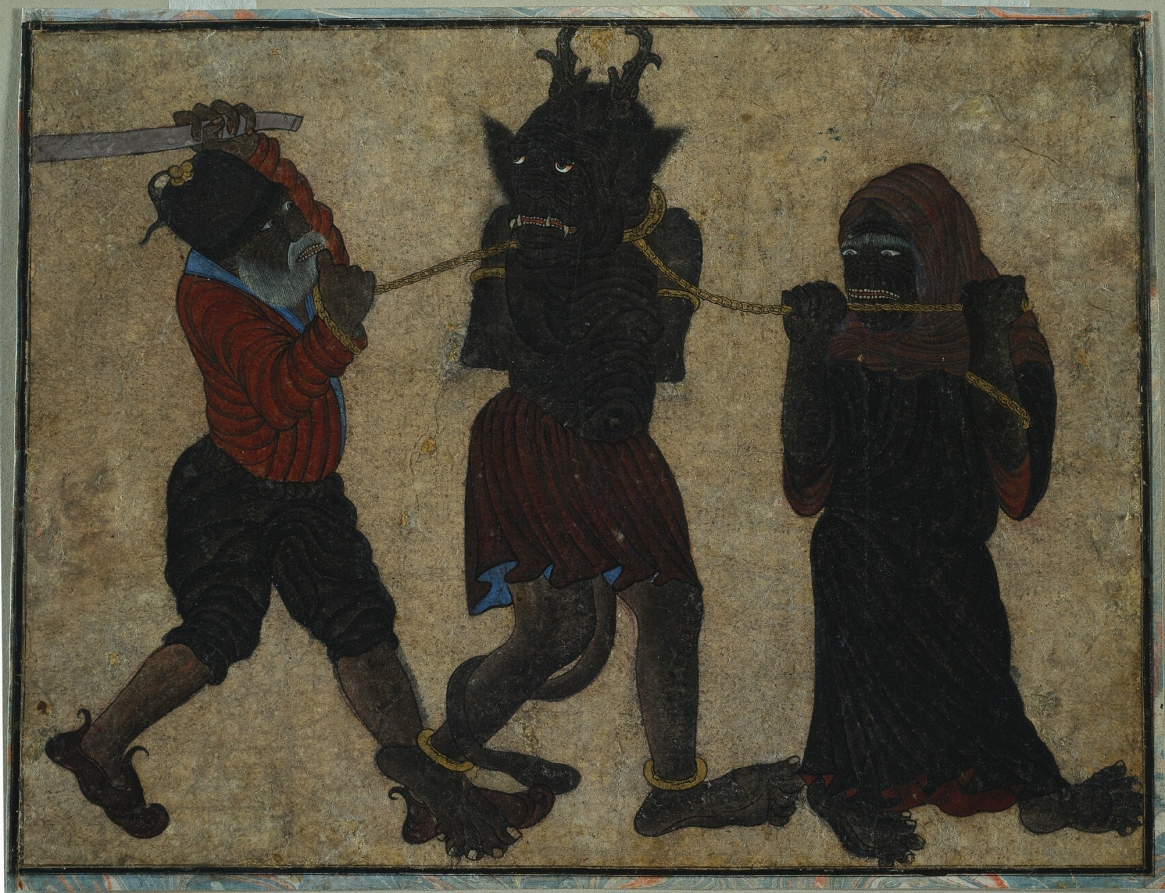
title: Demon in chains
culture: Iran or Central Asia, Timurid or Turkoman Period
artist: style of Muhammad Siya Qalam (Iranian)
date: c. 1453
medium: opaque watercolor and gold on paper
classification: Manuscript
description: This page once belonged to a miscellany from the library of the early Ottonian sultans. It depicts two people in nomadic garb leading a demon, or Persian div, in chains between them. The female figure holding the chain to her face is painted to look nearly as ferocious as the captured div. The concept of divs as evil supernatural creatures of mysterious origin dates to pre-Islamic Persia, but they are also described in the text of the Qur'an. Divs in Persian literature and folktales are sometimes captured and forced to use their magic to serve a king or hero.